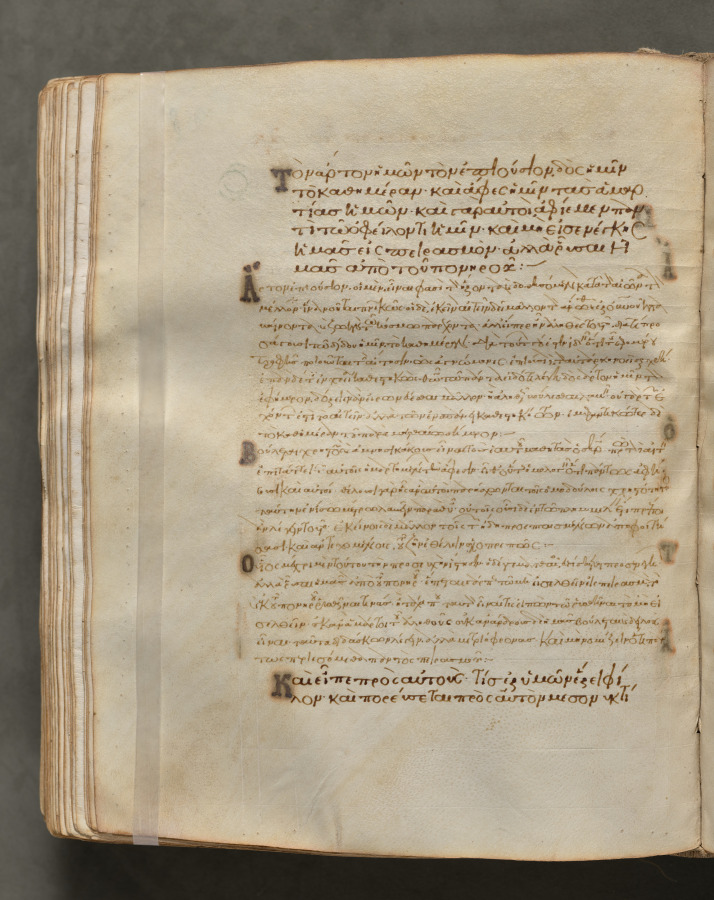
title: Text, folio 258 (verso), from a Gospel Book with Commentaries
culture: Byzantium, Constantinople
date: c. 1000–1100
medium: ink, tempera, and gold on vellum; leather binding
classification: Bound Volume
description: Each of the four gospels in this book opens on a page with brilliantly illuminated borders depicting the author of the text as well as birds—principally peacocks, symbols of the immortality of the soul—and fountains, representing the fountain of life and the salvation of the soul. This volume consists of 428 leaves with texts in Greek. Its level of sophistication suggests that it was probably written and decorated in a monastery in Constantinople.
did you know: Gospel books were carried in procession through Byzantine churches.